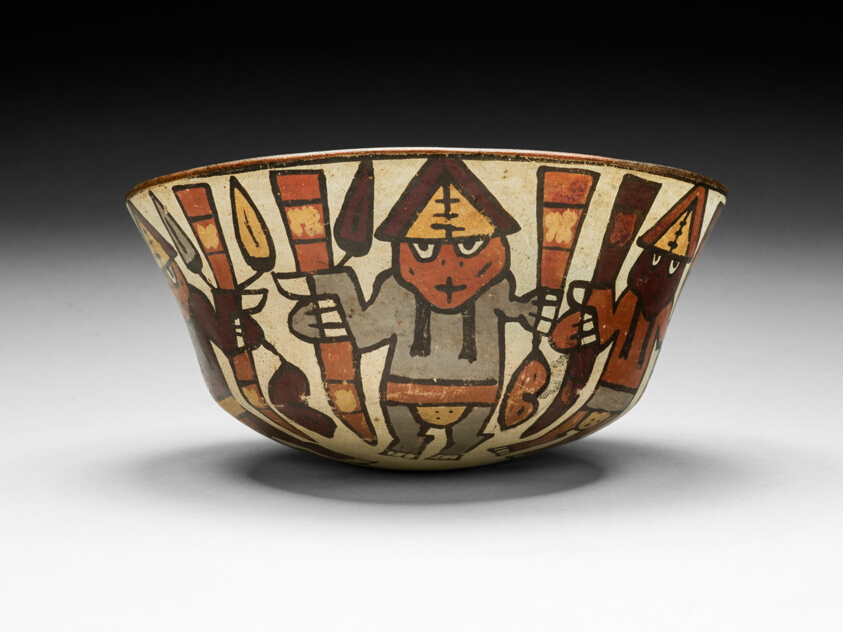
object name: Vessel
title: Bowl Depicting a Harvest Dance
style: nazca, early intermediate period, Pre-Columbian, americas, andes, Arts of the Americas, andean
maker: Nazca; South coast, Peru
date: 180 BCE–500 CE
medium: Ceramic and pigment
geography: Peru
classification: bowl; earthenware; art of the americas; ceramics; vessel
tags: people, landscapes, agriculture, ritual